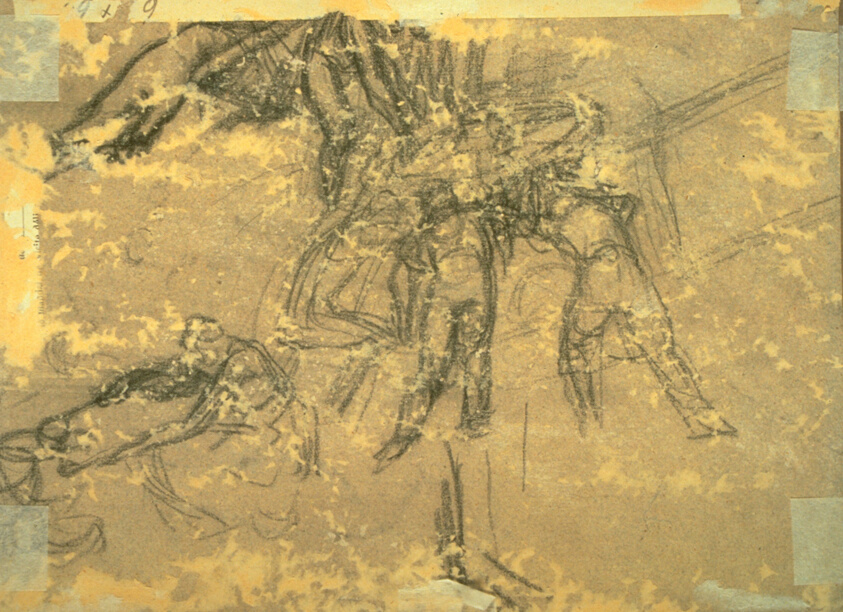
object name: Drawing and Watercolor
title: Study: Nude Woman Seen from the Back (recto) Sketches of Peasants Working (verso)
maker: Jean François Millet (French, 1814-1875)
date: c. 1846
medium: Black crayon on gray laid paper, with blue fibers (discolored to buff with tan and blue fibers)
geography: France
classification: crayon; drawings (visual works); prints and drawing